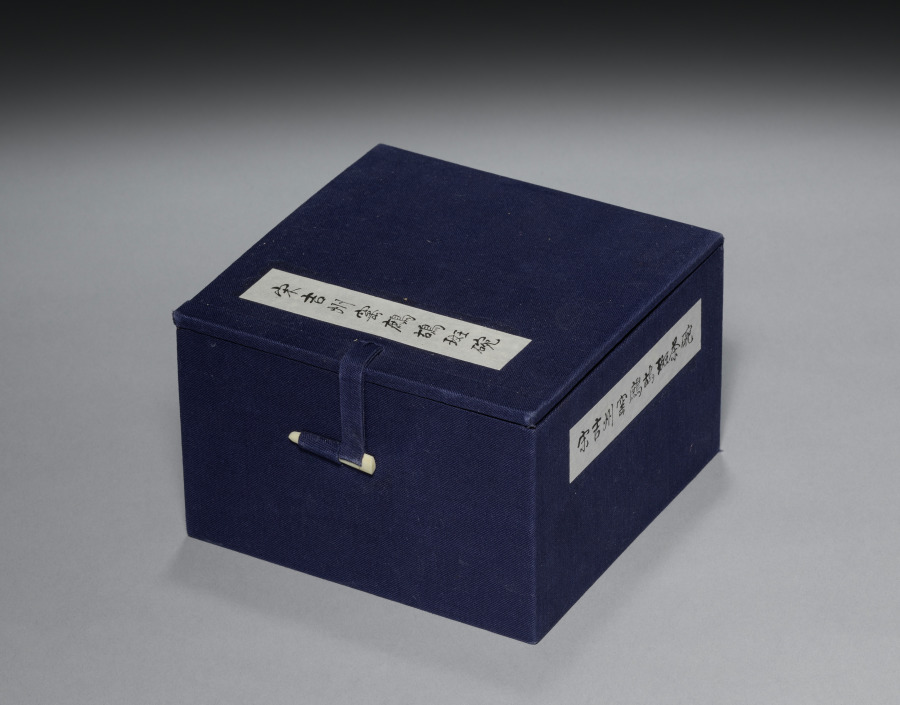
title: Teabowl with Tortoiseshell Glaze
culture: China, Jiangxi Province, Southern Song dynasty (1127–1279)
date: 1100s–1200s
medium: Brown-glazed stoneware with "tortoiseshell" pattern, Jizhou ware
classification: Ceramic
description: This teacup with a so-called tortoiseshell glaze is a fine example of southern ware from Jizhou, where potters specialized in brown splashed glazes sometimes resembling partridge feathers or tortoise shells. The variety of dark glazes and vessel types produced by the Jizhou kilns are evidence of the popularity of black ware at the time. Jizhou kiln potters competed with the Jian kilns which produced almost exclusively teacups, such as the Black-Glazed Teabowl (CMA 2020.176) and the Black-Glazed Teabowl with Incised Characters (CMA 2020.175).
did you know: The Jizhou kiln site is designated as one of fifty-one Major National Historical and Cultural Sites in Jiangxi province.